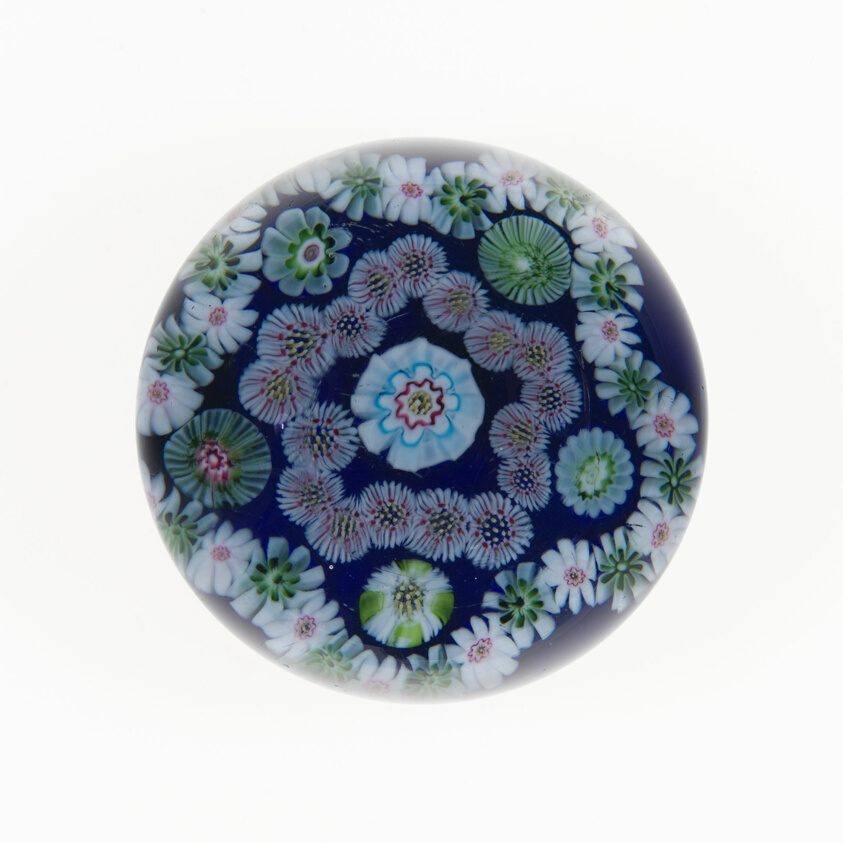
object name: Glass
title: Paperweight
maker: Clichy Glassworks (Cristalleries de Clichy); Clichy, France, 1837-1885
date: 19th century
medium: Glass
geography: Clichy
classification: paperweight; millefiori; european decorative arts; glass